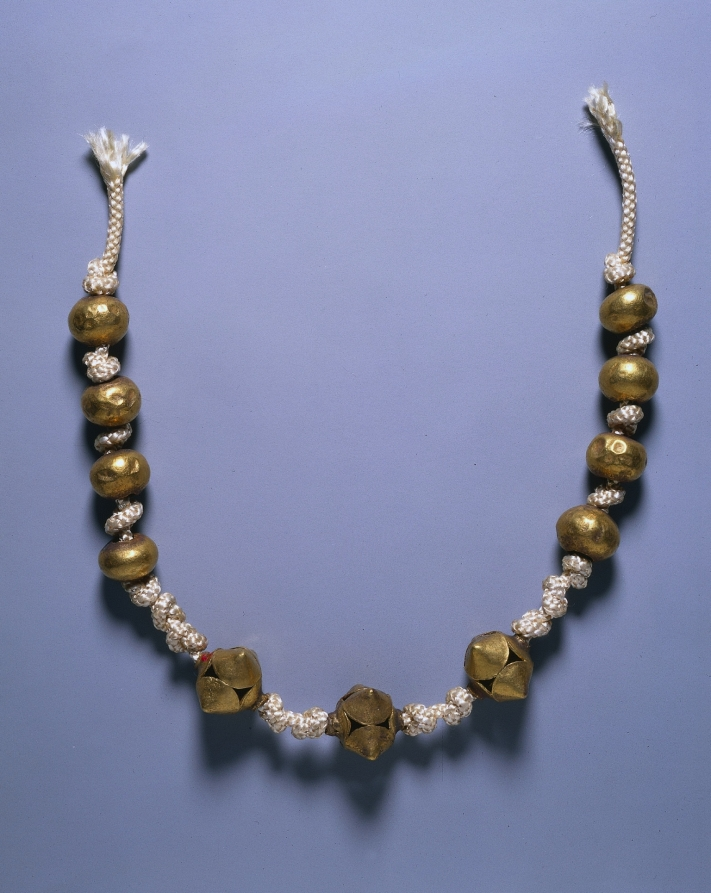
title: Beads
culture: Colombia, Muisca style(?)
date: c. 900–1550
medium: hammered gold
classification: Jewelry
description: The larger beads have pellets inside, and tinkle when shaken.